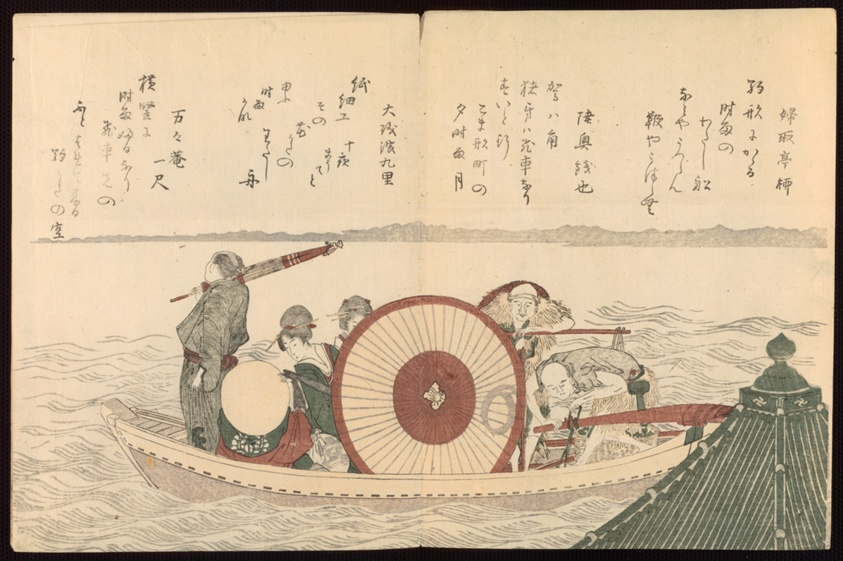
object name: Book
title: Birds of the Capital (Miyakodori)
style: Japanese (culture or style)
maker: Katsushika Hokusai 葛飾 北斎; Japanese, 1760-1849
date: c. 1802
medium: Color woodblock printed book; 1 vol.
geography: Japan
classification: book; woodblock print